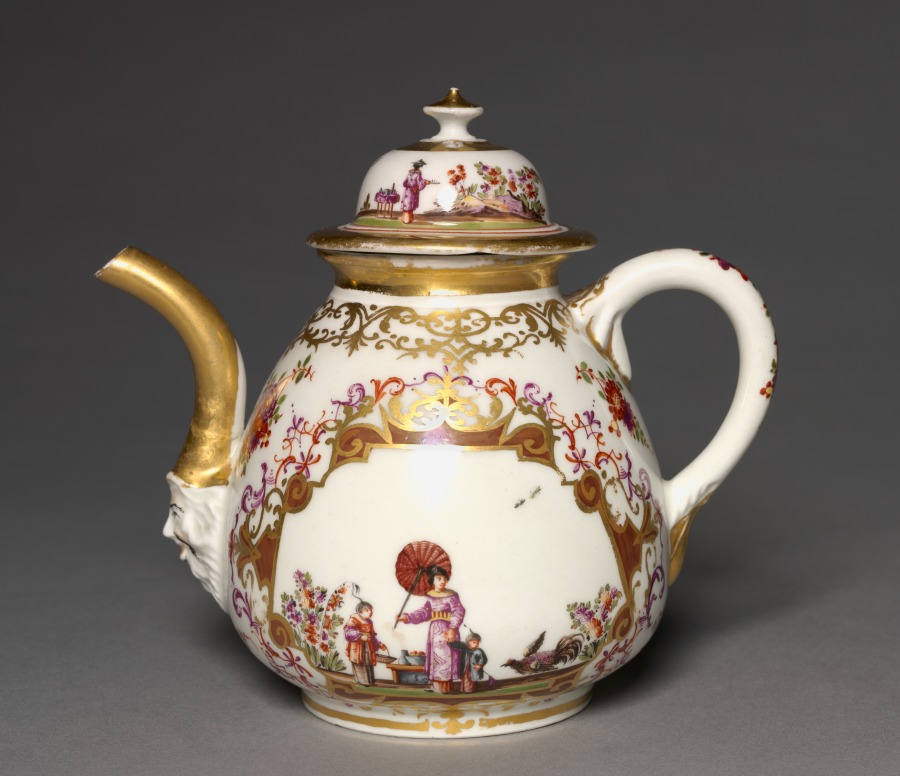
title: Tea Pot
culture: Germany, Meissen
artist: Meissen Porcelain Factory (German, est. c. 1710)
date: c. 1723–24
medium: gilt porcelain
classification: Ceramic